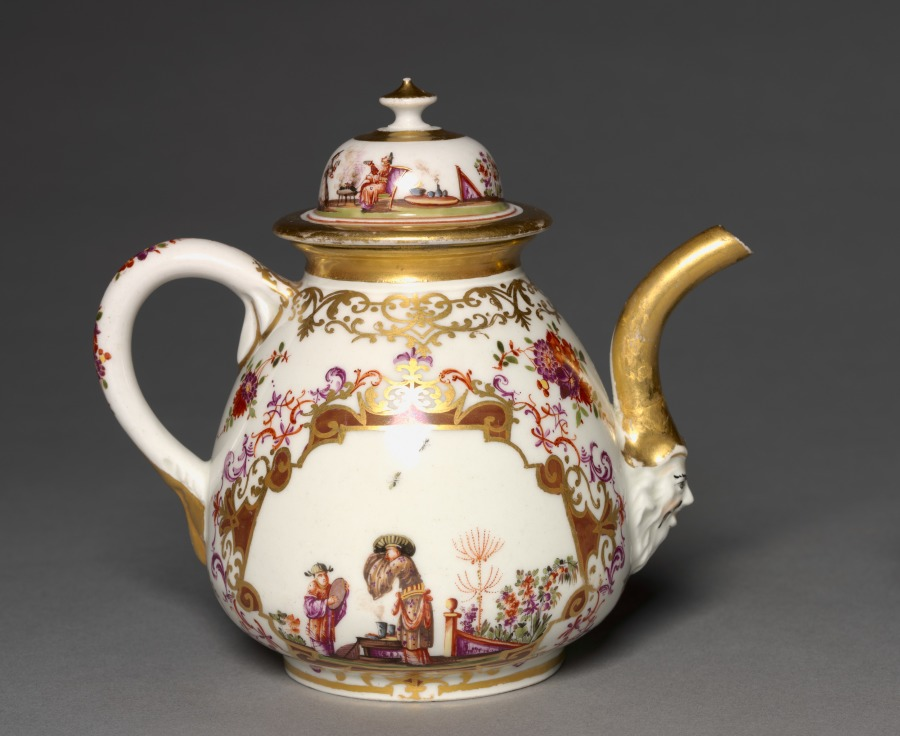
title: Tea Pot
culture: Germany, Meissen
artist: Meissen Porcelain Factory (German, est. c. 1710)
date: c. 1723–24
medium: gilt porcelain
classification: Ceramic